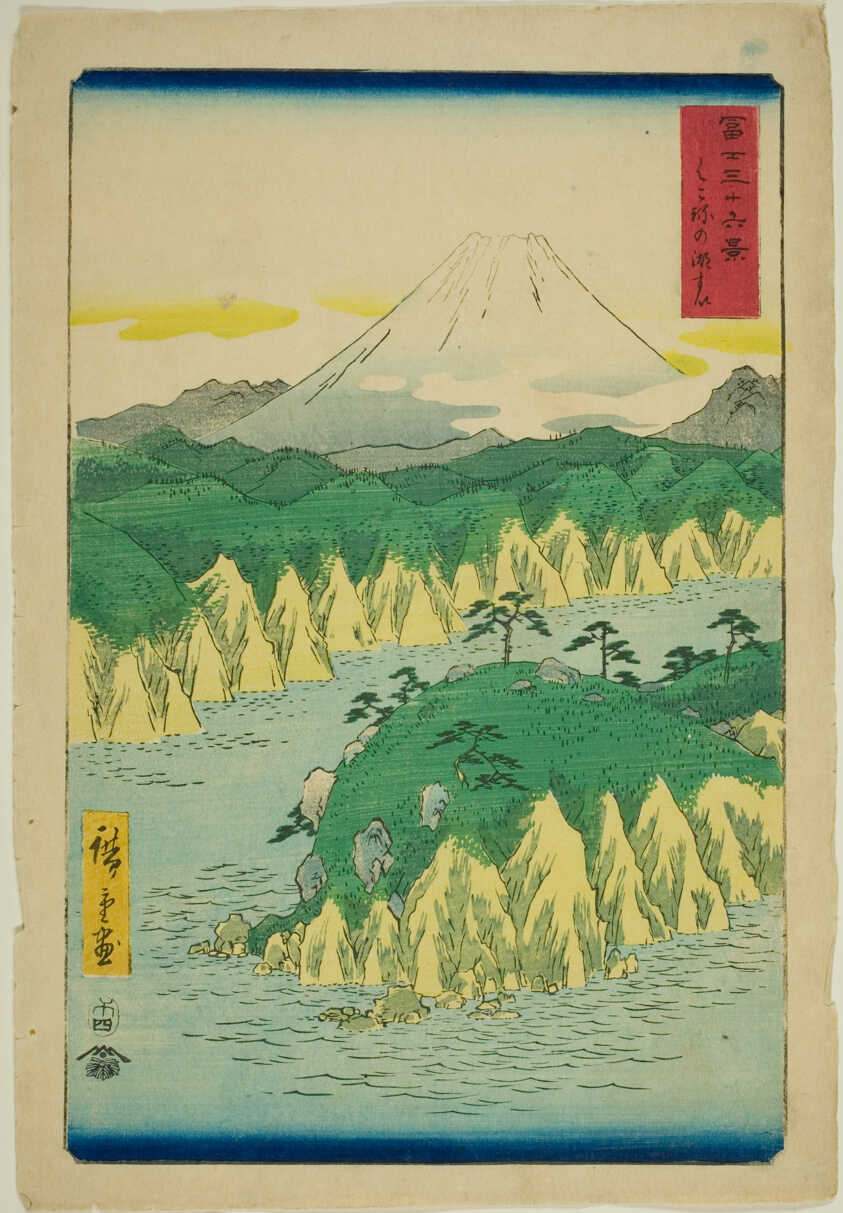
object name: Print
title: Lake at Hakone (Hakone no kosui), from the series "Thirty-six Views of Mount Fuji (Fuji sanjurokkei)"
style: edo (japanese period), Japanism, East Asian, asian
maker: Utagawa Hiroshige 歌川 広重; Japanese, 1797-1858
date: 1858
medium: Color woodblock print; oban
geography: Japan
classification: woodblock print; print; asian art